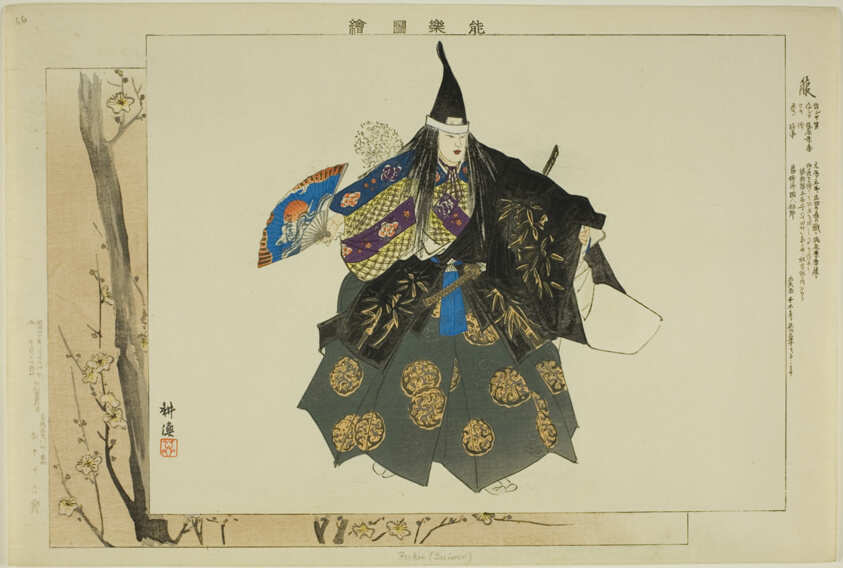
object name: Print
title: Fuku, from the series "Pictures of No Performances (Nogaku Zue)"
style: Japanese (culture or style)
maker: Tsukioka Kogyo; Japanese, 1869-1927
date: 1898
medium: Color woodblock print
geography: Japan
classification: woodblock print; print; asian art